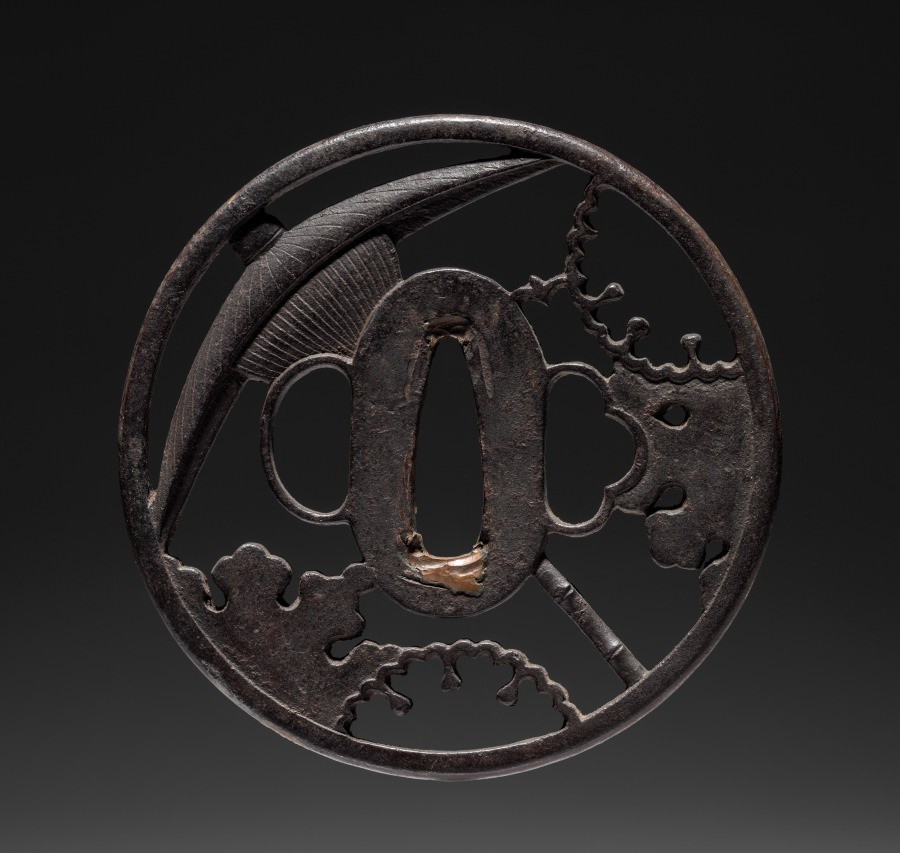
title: Sword Guard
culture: Japan, Edo period (1615–1868)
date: 1615–1868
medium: iron (Akasaka type)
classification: Arms and Armor